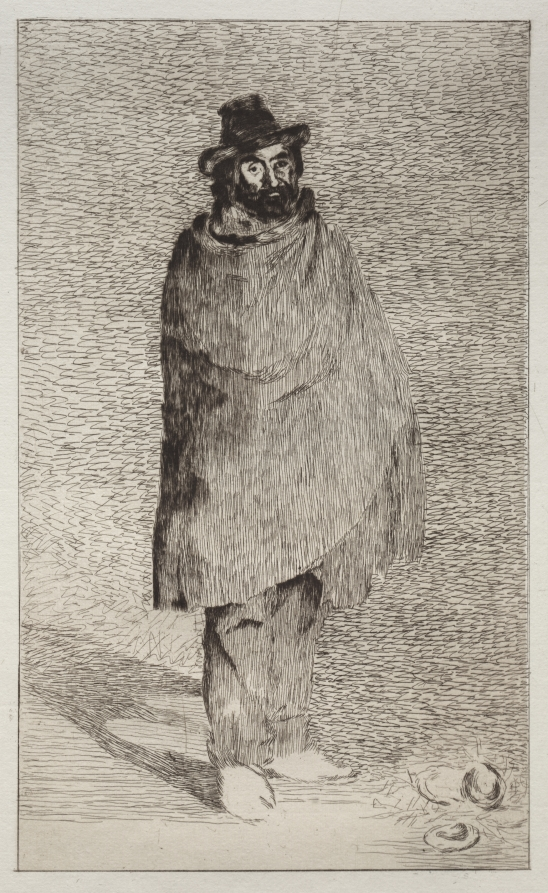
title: The Philosopher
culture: France, 19th century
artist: Édouard Manet (French, 1832–1883)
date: 1866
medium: etching and drypoint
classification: Print